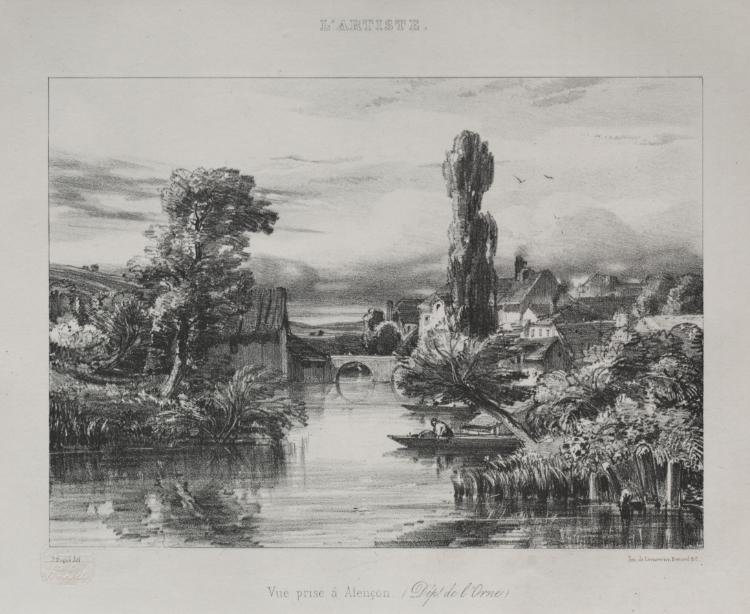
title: View near Alençon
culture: France, 19th century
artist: Jules Dupré (French, 1811–1889)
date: 1839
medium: lithograph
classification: Print